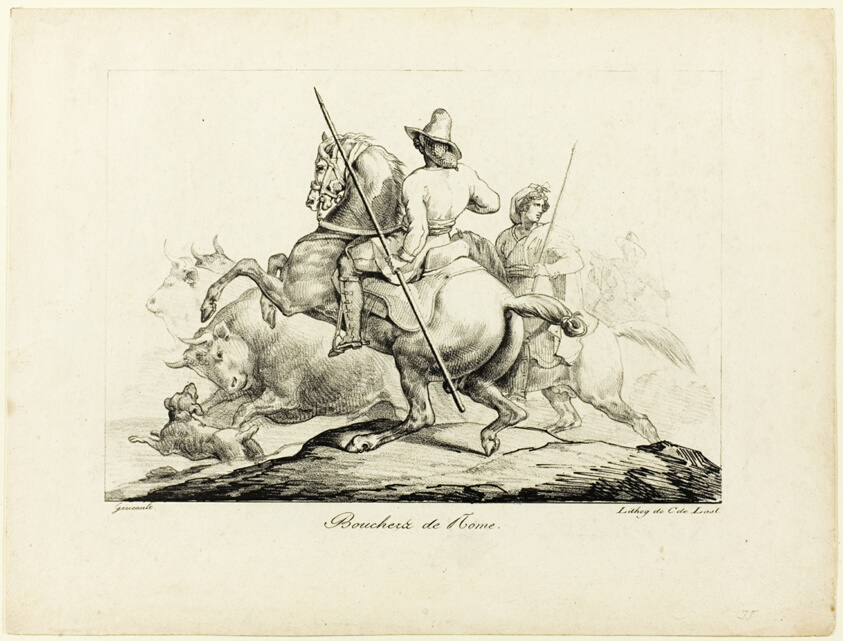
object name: Print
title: Butchers of Rome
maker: Jean Louis André Théodore Géricault (French, 1791-1824); printed by comte de Charles Philibert Lasteyrie du Saillant (French, 1759-1849)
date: 1817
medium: Lithograph in black on cream wove paper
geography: France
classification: lithograph; print; prints and drawing